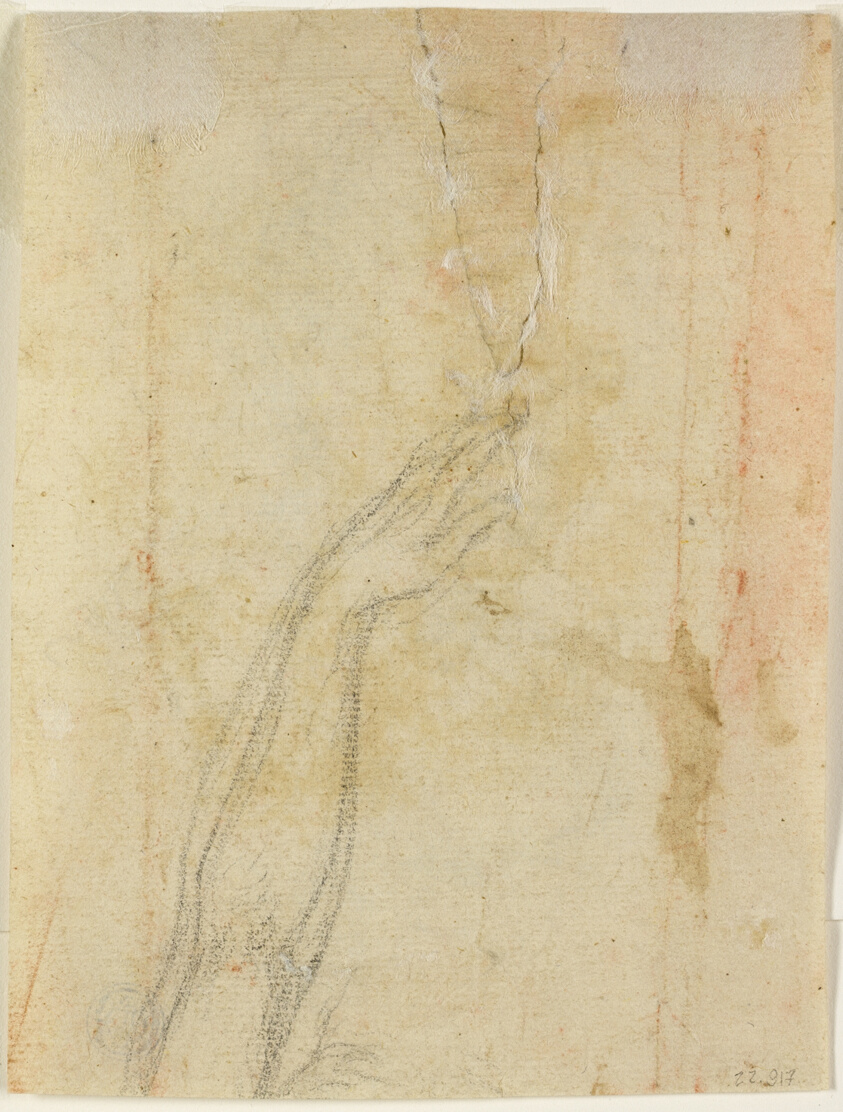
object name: Drawing and Watercolor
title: Woman's Head (recto); Sketch of Arm and Hand (verso)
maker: Follower of Paolo Veronese (Italian, 1528-1588)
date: 1590/96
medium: Black chalk (recto and verso) on cream laid paper, partially laid down on ivory laid paper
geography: Italy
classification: chalk; drawings (visual works); prints and drawing